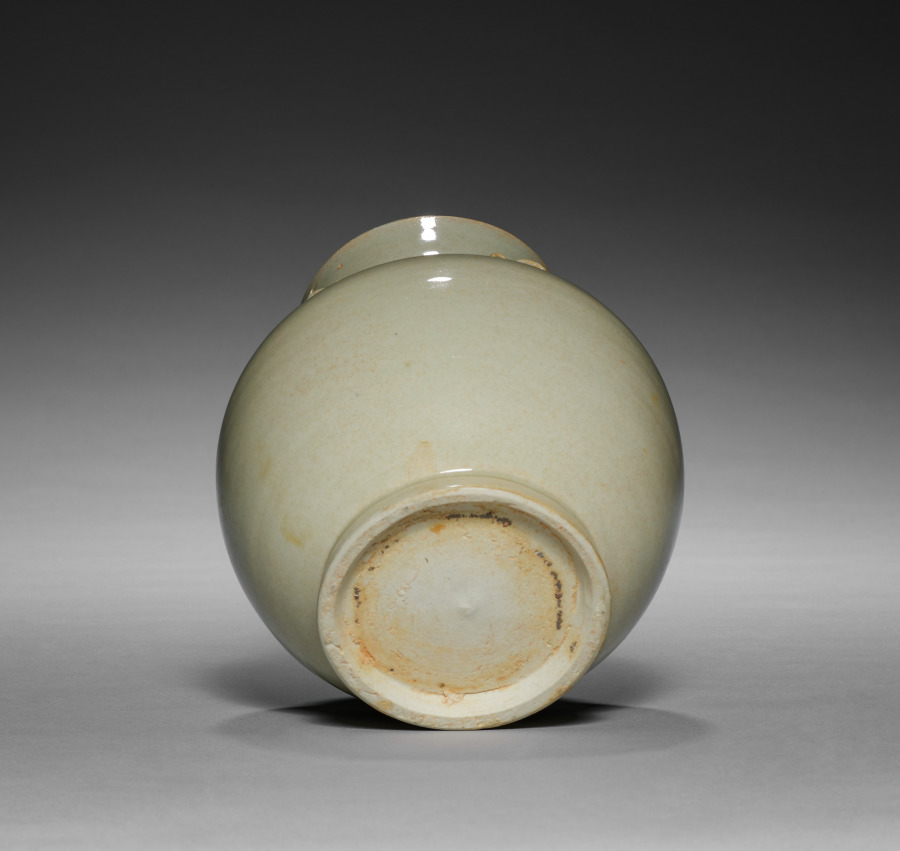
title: Globular Jar with Four Loops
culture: China, Southern Song dynasty (1127-1279)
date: 960–1279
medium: Porcelaneous ware of the qingbai type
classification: Ceramic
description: In the 900s, potters in southeast China excelled in producing white ceramics, including bluish-white (qingbai; 青白) glazed ware. The Keithleys’ jar was made when the qingbai ware–producing kilns were most active and manufactured their finest ware. The jar is missing its cover, which would have been flat with a loop in the center so that it could be tied in place with a string or silk cloth.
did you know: This container was probably used to store tea or grain.